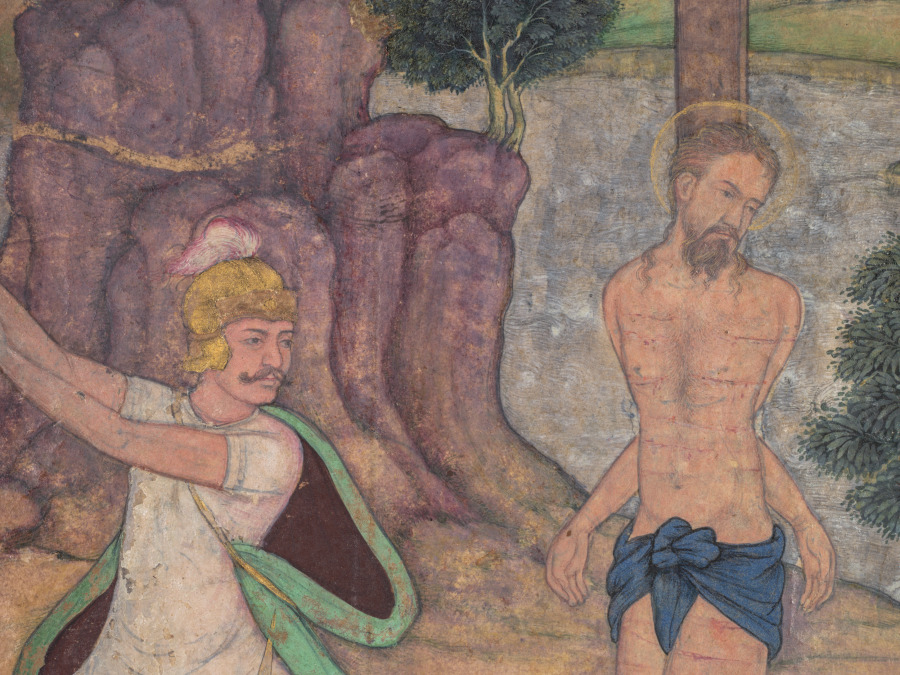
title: The Flagellation (folio 182 recto), from a Mirror of Holiness (Mir’at al-quds) of Father Jerome Xavier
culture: Mughal India, Allahabad, made for Prince Salim (1569–1627)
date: 1602–4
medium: Gum tempera, ink, color, and gold on paper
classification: Manuscript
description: Two Romans flog Jesus, who has been bound to a stake at the center of the circular composition made up of soldiers and the hilly horizon. His subtly articulated expression conveys both pain and compassion, as he endures cuts to his flesh and the bindings around his elbows that secure him so tightly to the post that his feet are elevated off the ground. This is the last illustration in the Cleveland manuscript of the Mirror of Holiness. The Crucifixion was never illustrated, possibly because the patron, Prince Salim, was Muslim. According to the Koran, Jesus did not die on the cross, but was absorbed into heaven by Allah.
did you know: A halo encircles Jesus’s head, and his hair and beard are highlighted with gold.